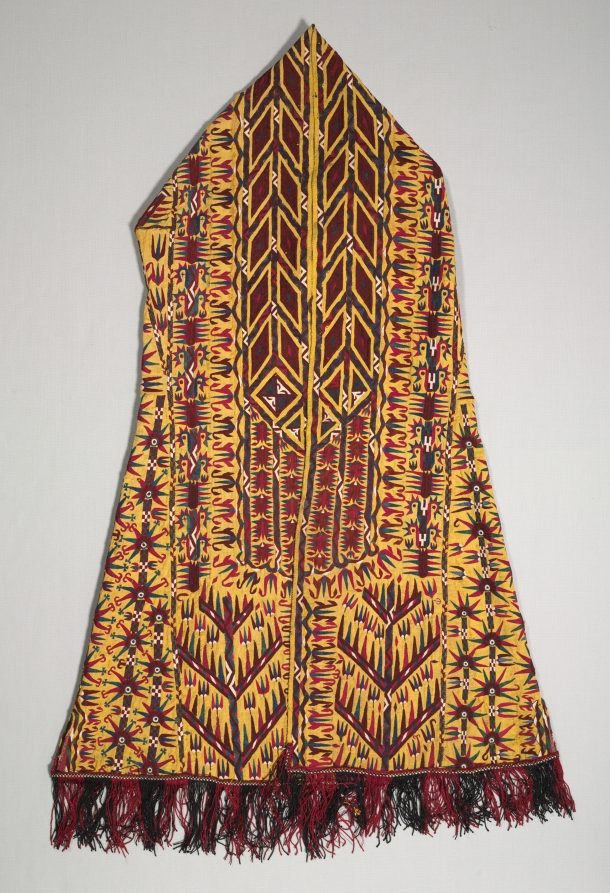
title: Woman’s Mantle (Chyrpy)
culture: Central Asia, Turkmenistan, Tekke tribe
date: late 1800s–early 1900s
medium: Exterior: silk; plain weave; embroidery: chain stitch; Trim: silk; tablet-woven with fringe; Lining: cotton; plain weave, block printed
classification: Garment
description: Traditional costumes in central Asia have distinctive characteristics that indicate ethnicity, age, and class. One of the oldest examples is a woman’s coat with false sleeves attached on the back and worn over the head. This silk coat in yellow, the color worn by middle-aged women, is elaborately decorated with popular stylized tulips embroidered in chain stitch. Worn consistently by a newlywed, the coat was later only used on special occasions. Although women made and embroidered garments at home, this expensive luxury mantle was professionally made and sold in the marketplace.